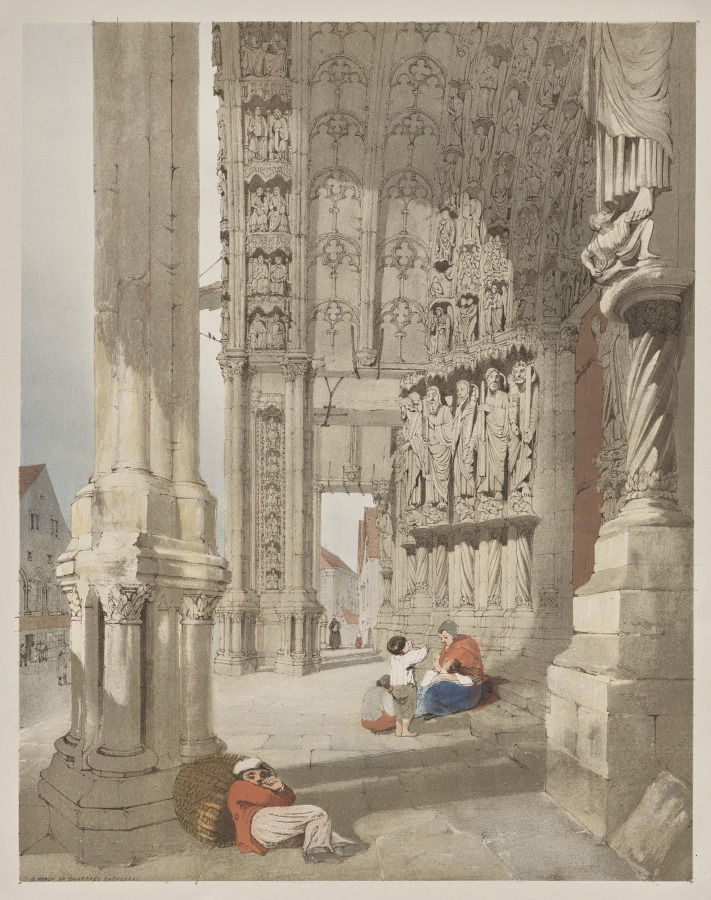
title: Picturesque Architecture in Paris, Ghent, Antwerp, Rouen: South Porch of Chartres Cathedral, Chartres, France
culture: England, 19th century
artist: Thomas Shotter Boys (British, 1803–1874)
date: 1839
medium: lithograph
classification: Portfolio